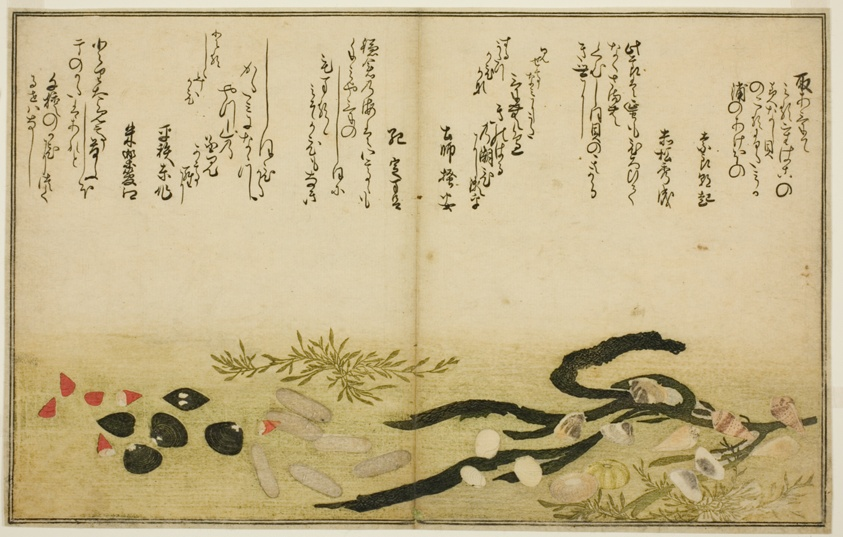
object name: Print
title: Minashi-gai, shio-gai, katatsu-gai, miso-gai, chijimi-gai, and chigusa-gai, from the illustrated book "Gifts from the Ebb Tide (Shiohi no tsuto)"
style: Japanese (culture or style)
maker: Kitagawa Utamaro 喜多川 歌麿; Japanese, 1753 (?)-1806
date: 1789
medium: Color woodblock print; double-page illustration from book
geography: Japan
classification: woodblock print; print; asian art